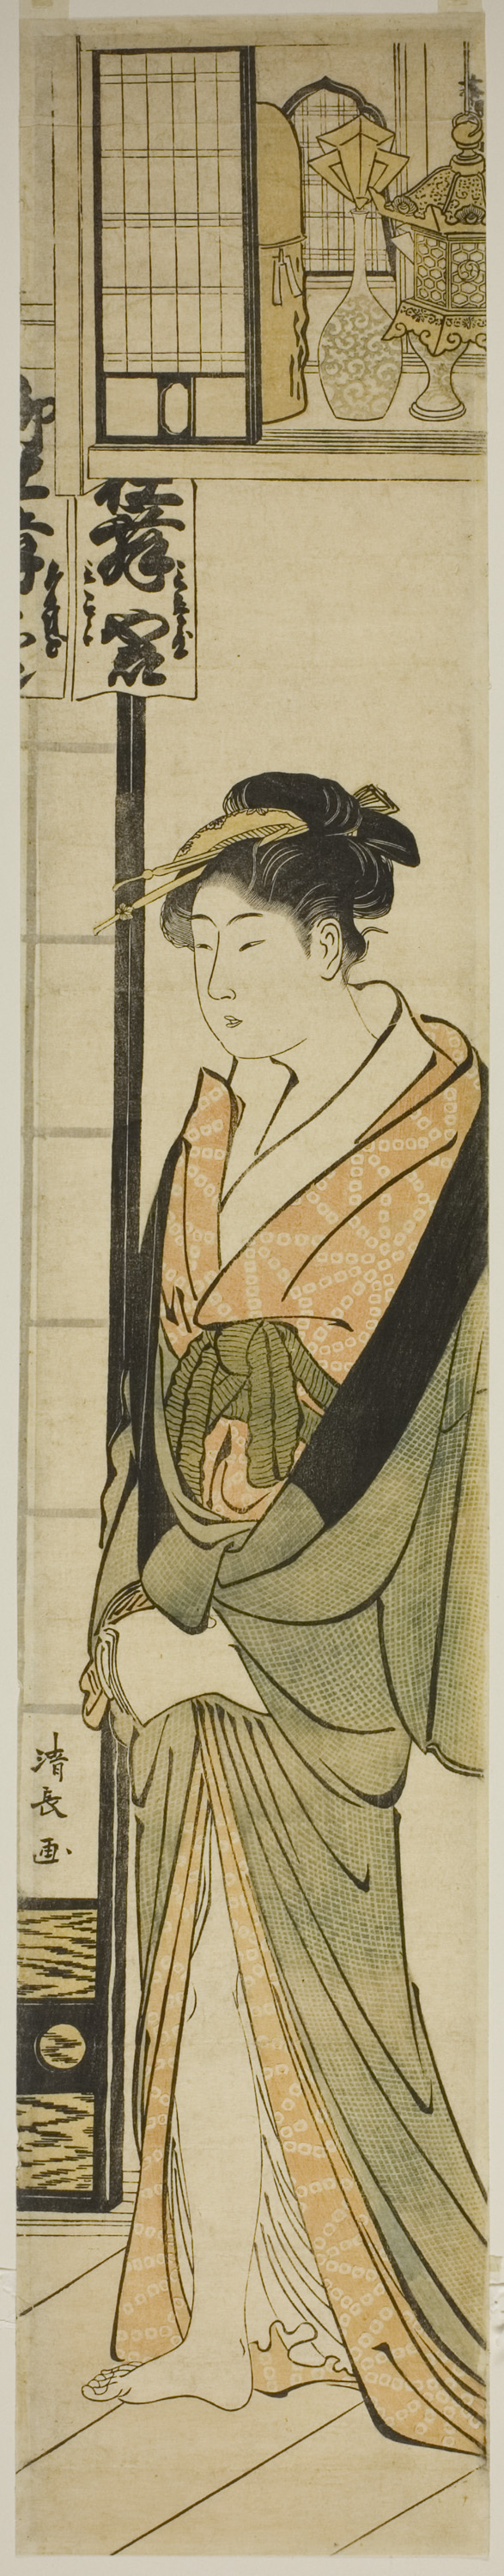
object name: Print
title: Courtesan Standing Beneath a Shelf for Talismans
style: Japanese (culture or style)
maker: Torii Kiyonaga (Japanese, 1752-1815)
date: c. 1783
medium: Color woodblock print; hashira-e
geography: Japan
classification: woodblock print; print; asian art